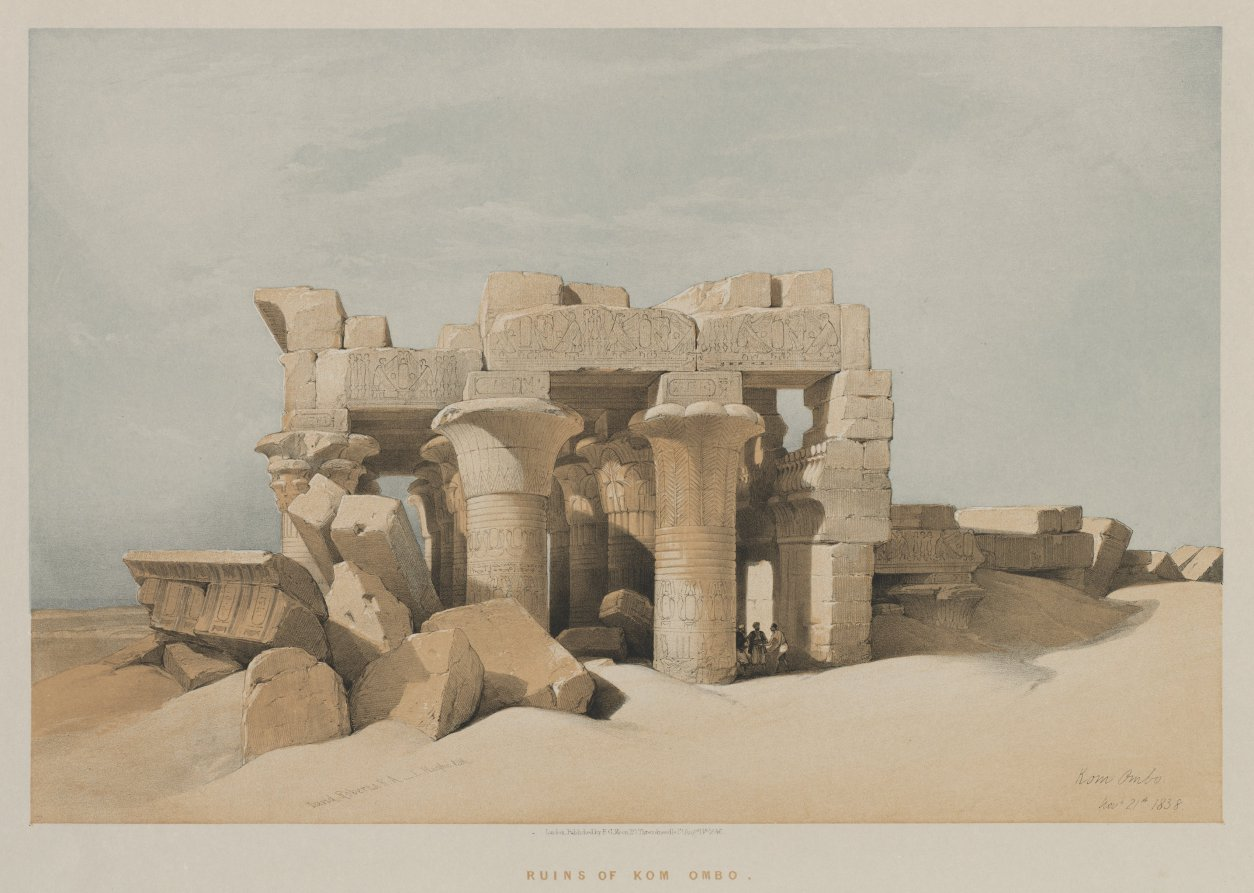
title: Egypt and Nubia, Volume I: Kom-Ombo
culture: England, 19th century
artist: Louis Haghe (British, 1806–1885)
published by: F. G. Moon, 20 Threadneedle Street, London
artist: after David Roberts (Scottish, 1796–1864)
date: 1846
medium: color lithograph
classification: Print